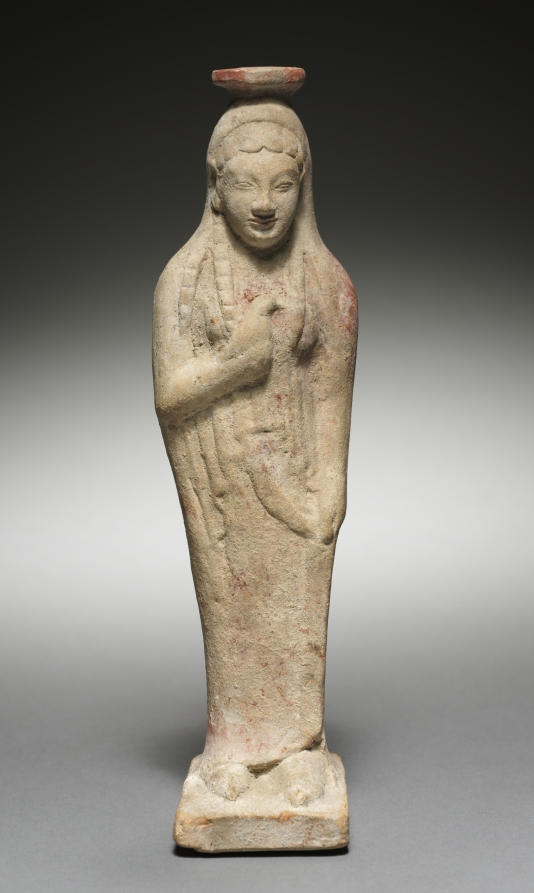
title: Kore-Shaped Perfume Flask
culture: Greece, Rhodes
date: 525–500 BCE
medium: terracotta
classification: Sculpture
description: Mold-made in the form of a standing maiden, or kore, this vessel likely once held expensive perfumed oil. The figure, who might represent the goddess Aphrodite, holds a dove by her chest with one hand, and her pleated drapery in the other. Traces of red pigment hint at a much more vibrant original appearance.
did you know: In ancient Greece, doves were symbols of beauty and love, associated with the goddess Aphrodite.